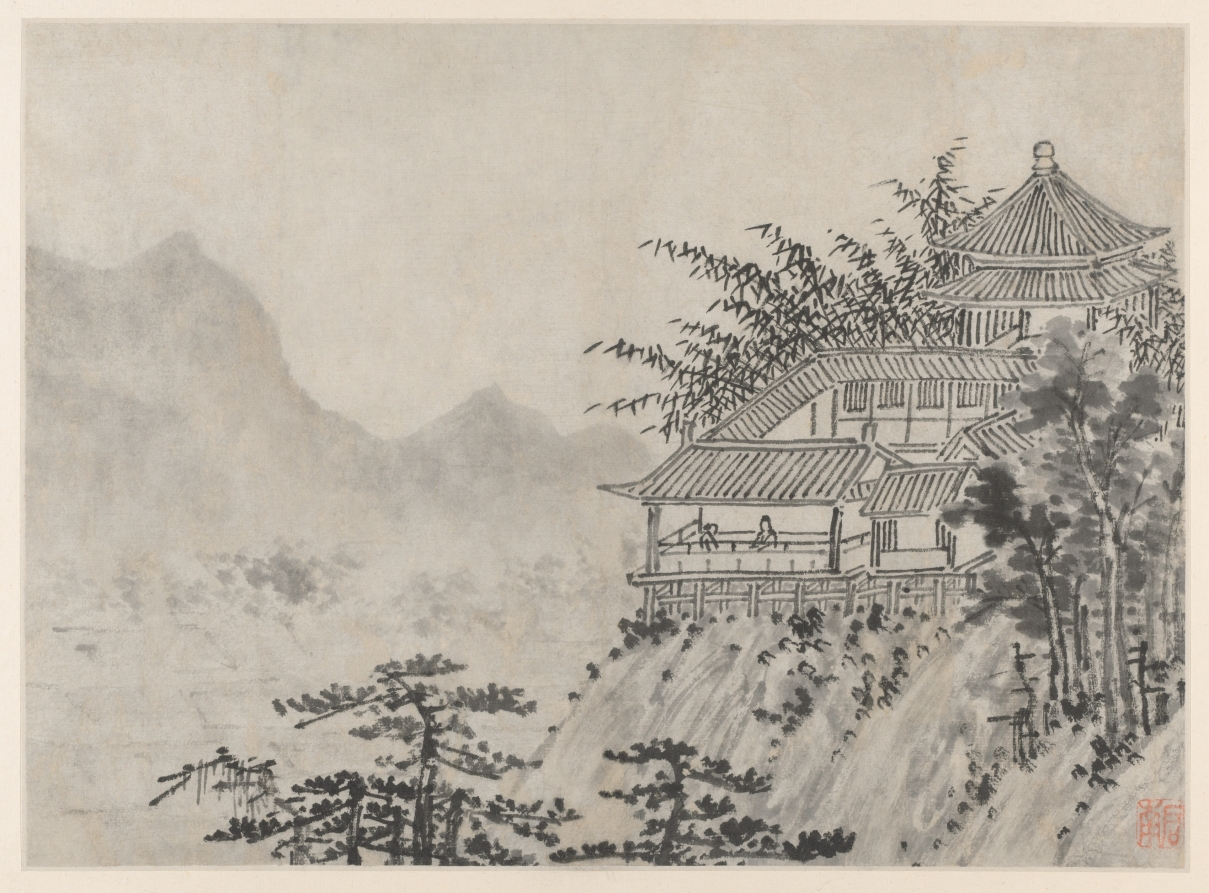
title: The Thousand Acres of Clouds, from Twelve Views of Tiger Hill, Suzhou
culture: China, Ming dynasty (1368–1644)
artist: Shen Zhou (Chinese, 1427–1509)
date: after 1490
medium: Album leaf; ink on paper or ink and slight color on paper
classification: Painting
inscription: [印] 启南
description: Views of Tiger Hill depicts a historic site a few miles northwest of Suzhou. The scenes simulate a visit from arriving by boat at the foot of the mountain to climbing to Cloudy Cliff Monastery. Representations of the artist’s mature style, Shen Zhou included views in subtle colors in the suite of monochrome scenes. A Suzhou native, Shen Zhou was supported by family wealth and rejected an official career in favor of life as a retired scholar. Turning to painting in midlife, he is regarded as the founder of the Wu School of painting, with its center in Suzhou.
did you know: Shen Zhou here painted the view over the Thousand Acres of Clouds.